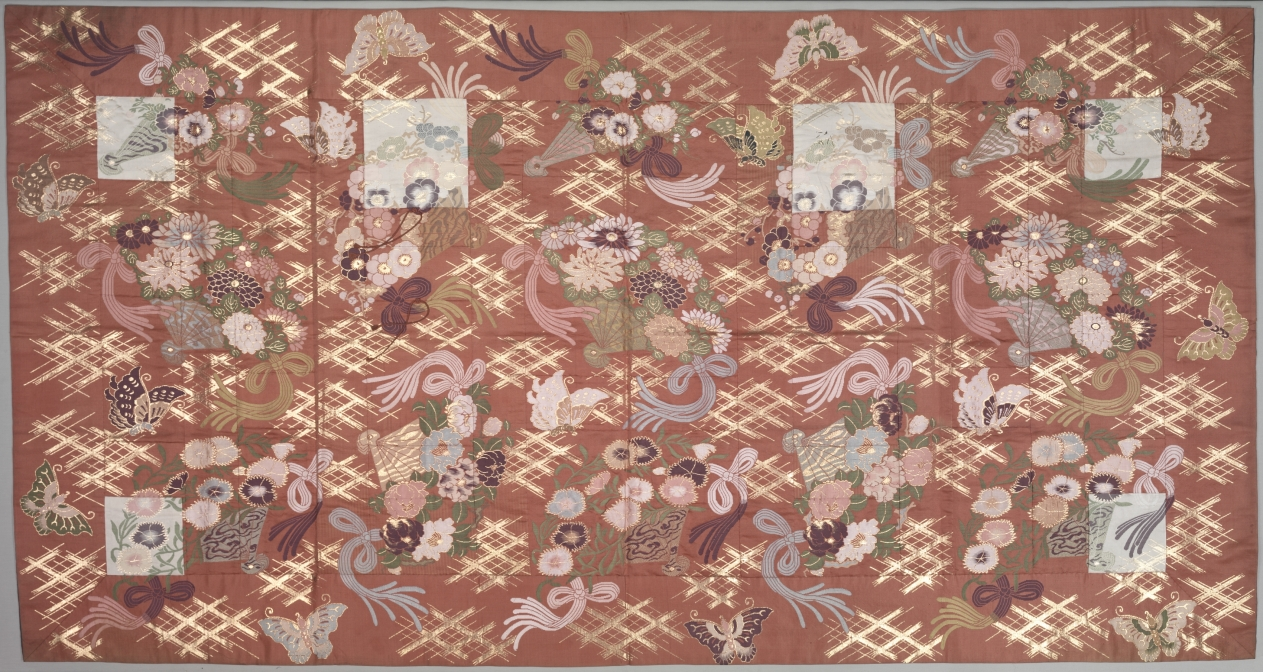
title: Buddhist Vestment (Kesa)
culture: Japan, Meiji period (1868–1912)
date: early 1900s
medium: silk; metal thread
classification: Garment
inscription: The back of this kesa has the inscription Shaku Joshin shido). The name indicates that the garment is associated with a True Pure Land Buddhist temple. A shido is a hall within the precincts of a Buddhist temple for the veneration of mortuary tablets of lay members of the temple community.